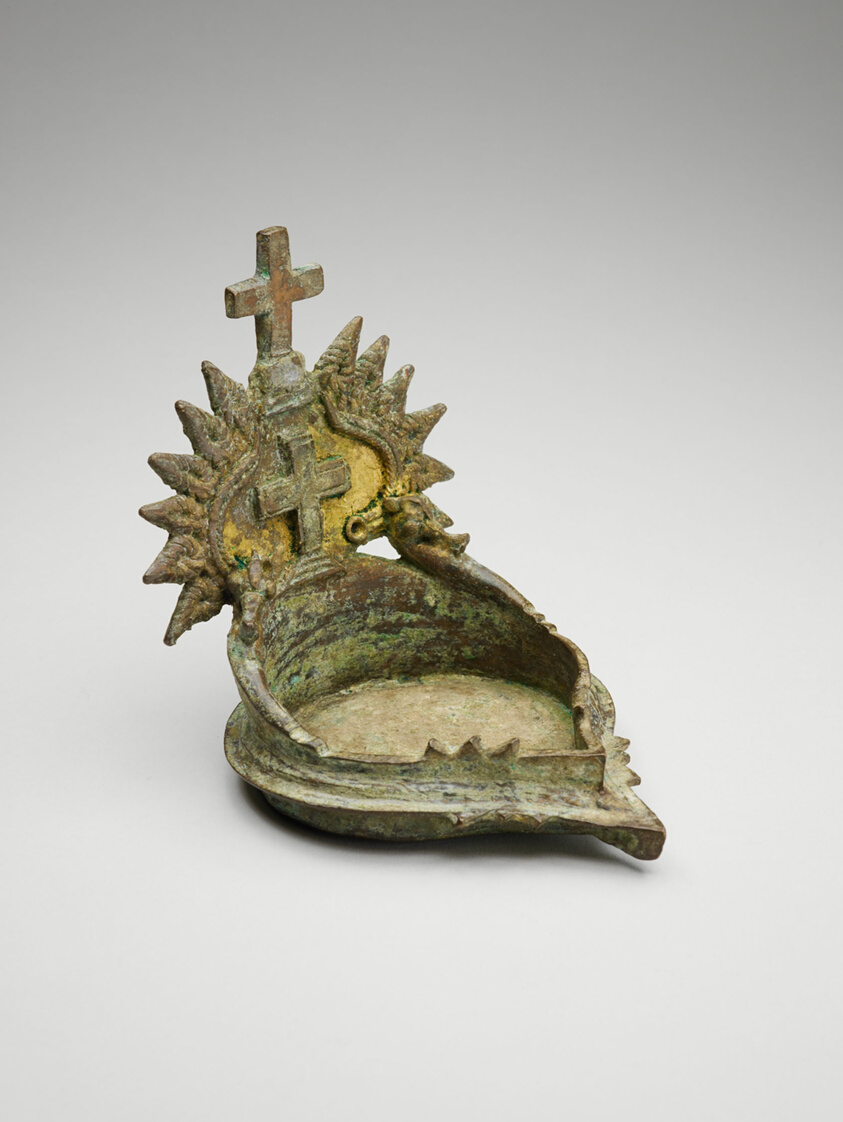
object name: Religious/Ritual Object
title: Oil Lamp with Christian Crosses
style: South Asian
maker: Sri Lanka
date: 16th/17th century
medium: Bronze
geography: Sri Lanka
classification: lamp (lighting device); bronze; metalwork; asian art; decorative arts; decorative object/ornament; functional object; ritual objects